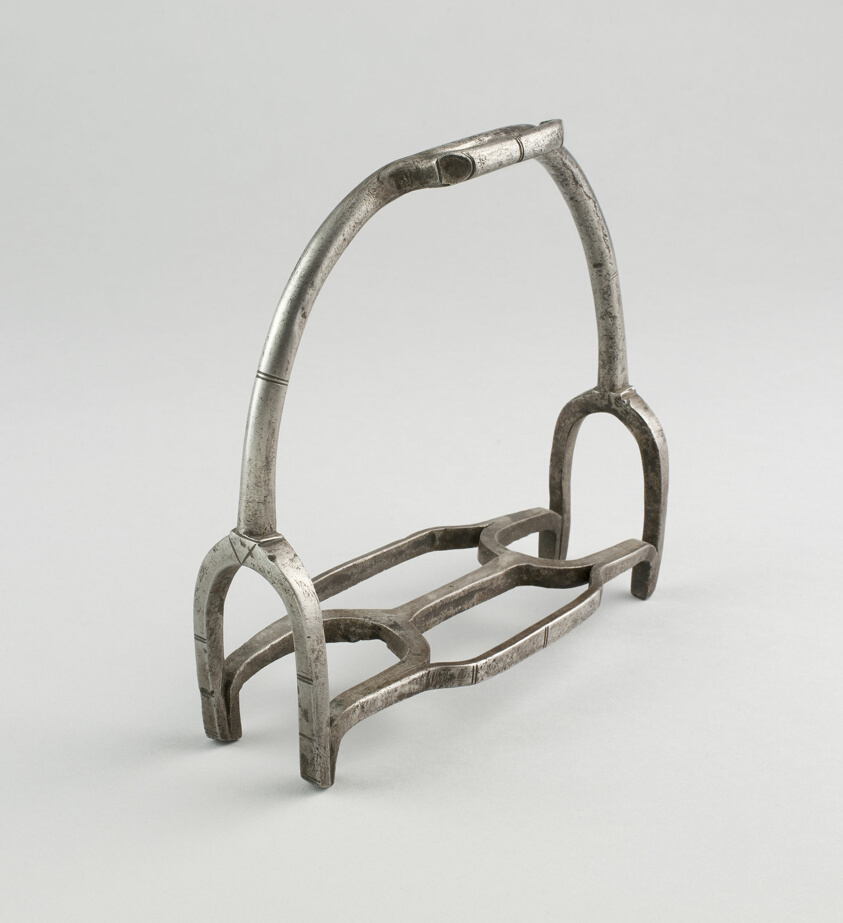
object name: Armor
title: Pair of Stirrups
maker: German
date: 19th century in early 16th century German style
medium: Iron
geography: Germany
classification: horse equipment; armor; arms and armor